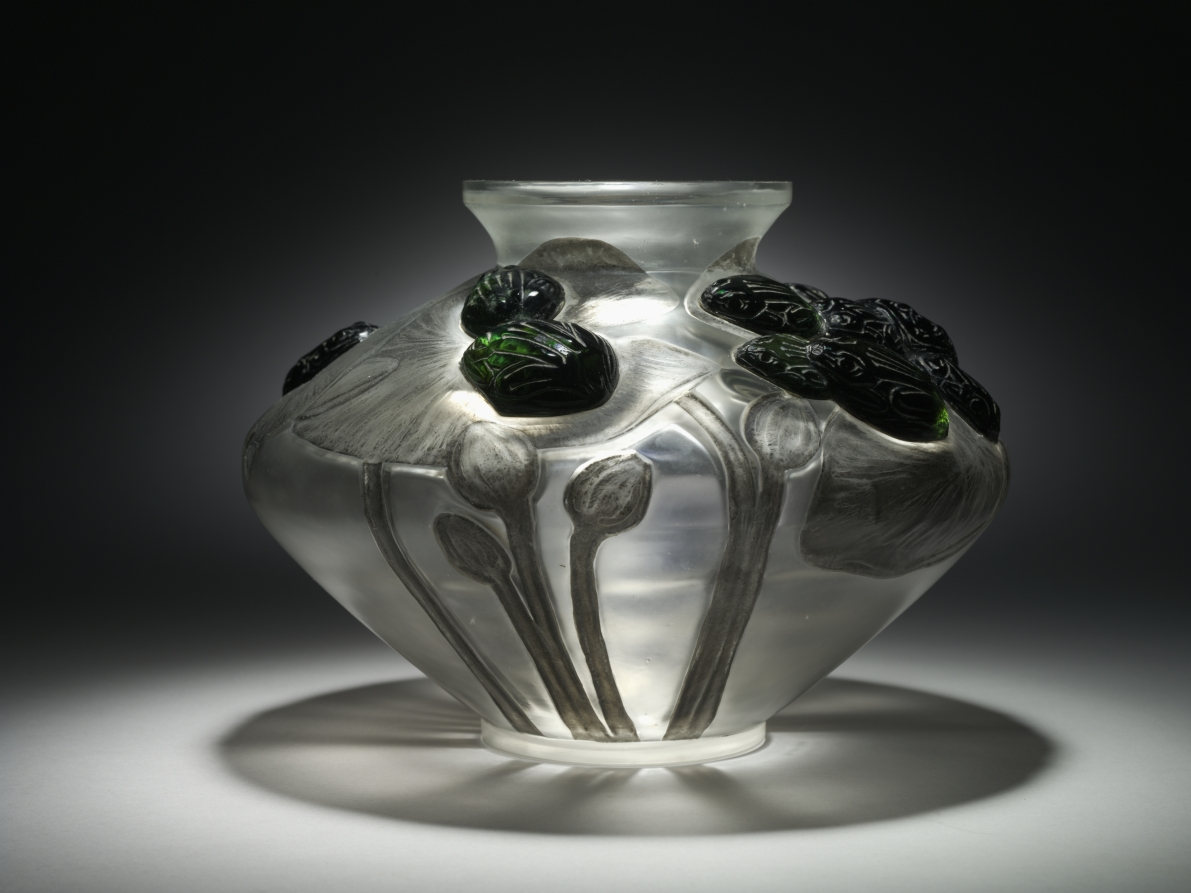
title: Frogs and Lily Pads (Grenouilles et Nénuphars) Vase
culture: France, 20th century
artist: René Lalique (French, 1860–1945)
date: 1909–12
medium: glass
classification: Glass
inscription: "R. Lalique"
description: This vase is an early example of French designer René Lalique's experimentation with producing artistic glass. Lalique combines applied, cast, and molded glass techniques to achieve an ethereal effect of a murky swamp, a typical Art Nouveau motif. Lily pads adorn the surface with green frogs perched on top.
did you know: René Lalique placed little sheets of metal foil behind the applied green frogs to reflect a dark green tint back to the viewer.